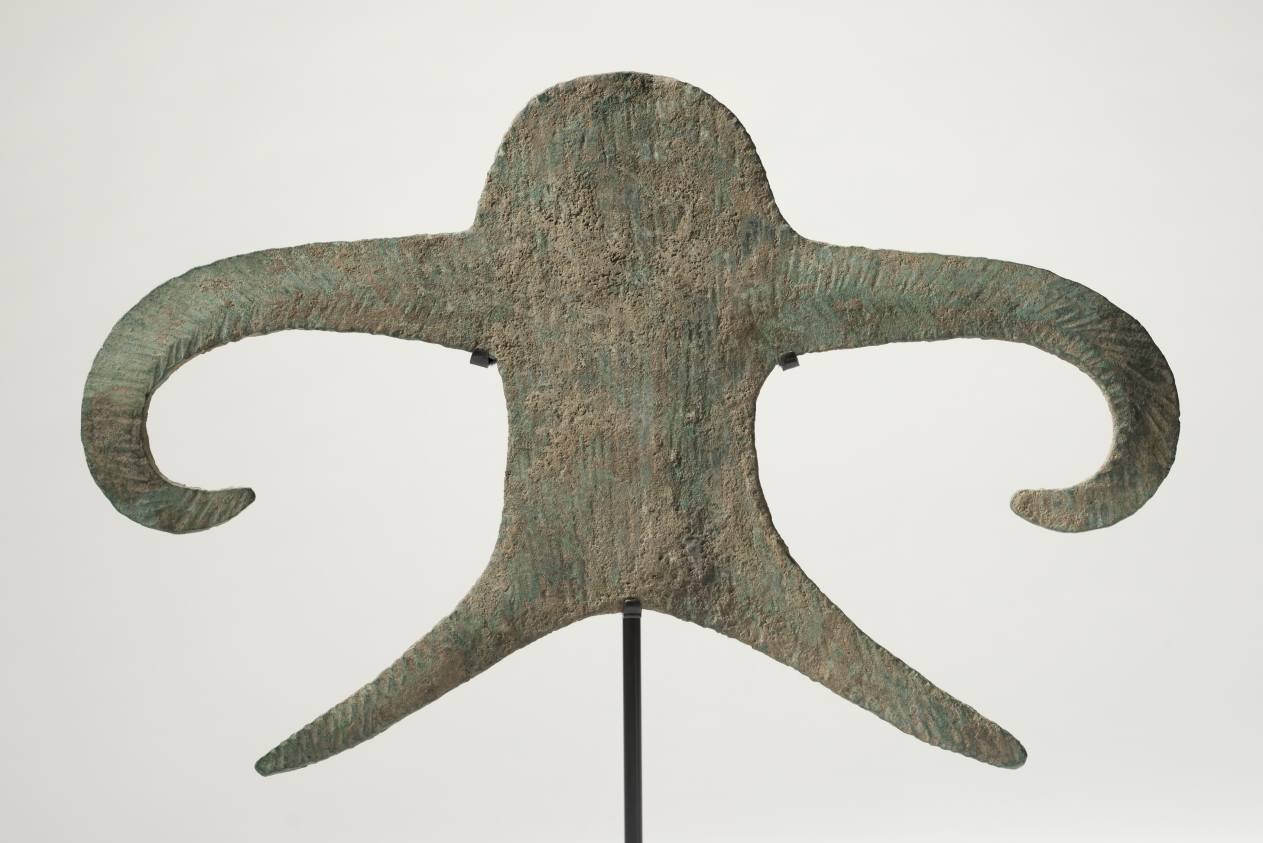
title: Anthropomorph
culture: India, Bronze Age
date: c. 1500–1000 BCE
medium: copper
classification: Sculpture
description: Among the few works of art known from the first millennium BC in India, anthropomorphs such as this fine example have an abstract formal appeal, but their meaning and function remain mysterious. They were made during the approximately 1,500-year long period of time between the protohistoric Indus Valley civilization, which flourished between about 2,800–1,800 BC, and the Maurya period (322–187 BC), when works of art must have been made in perishable materials that no longer survive.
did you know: Most of these mysterious objects were discovered in the plain regions of the Ganges and Yamuna Rivers of northern India.